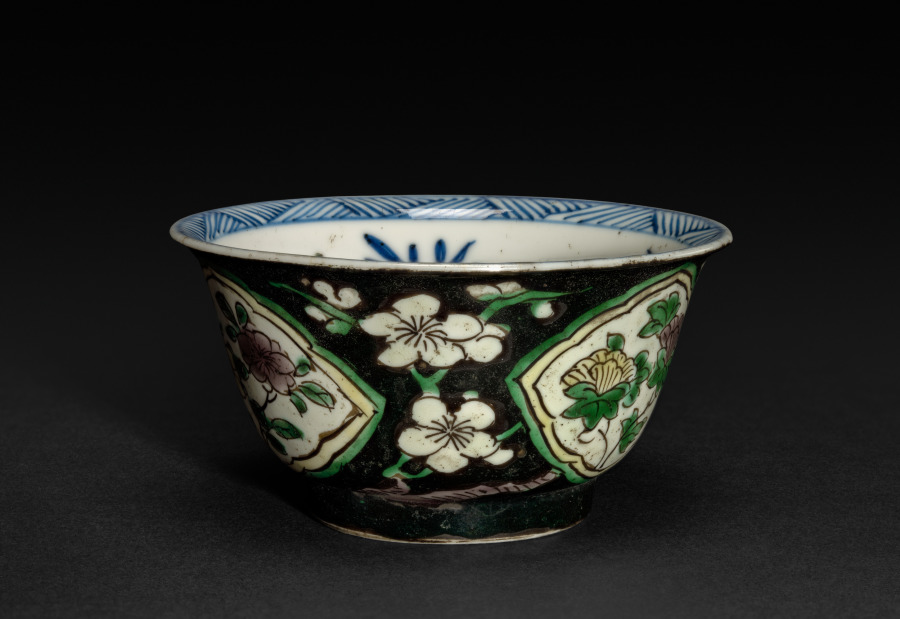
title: Cup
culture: China, Qing dynasty (1644-1911), Kangxi reign (1662-1722)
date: 1662–1722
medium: porcelain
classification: Ceramic